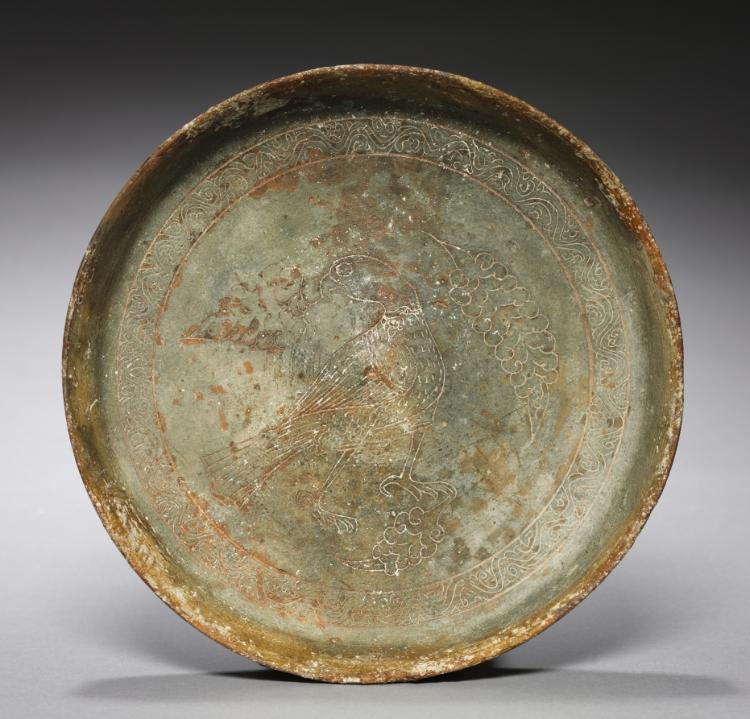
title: Deep Plate with Hawk and Foliage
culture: Byzantium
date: 1100s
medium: sgraffito earthenware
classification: Ceramic